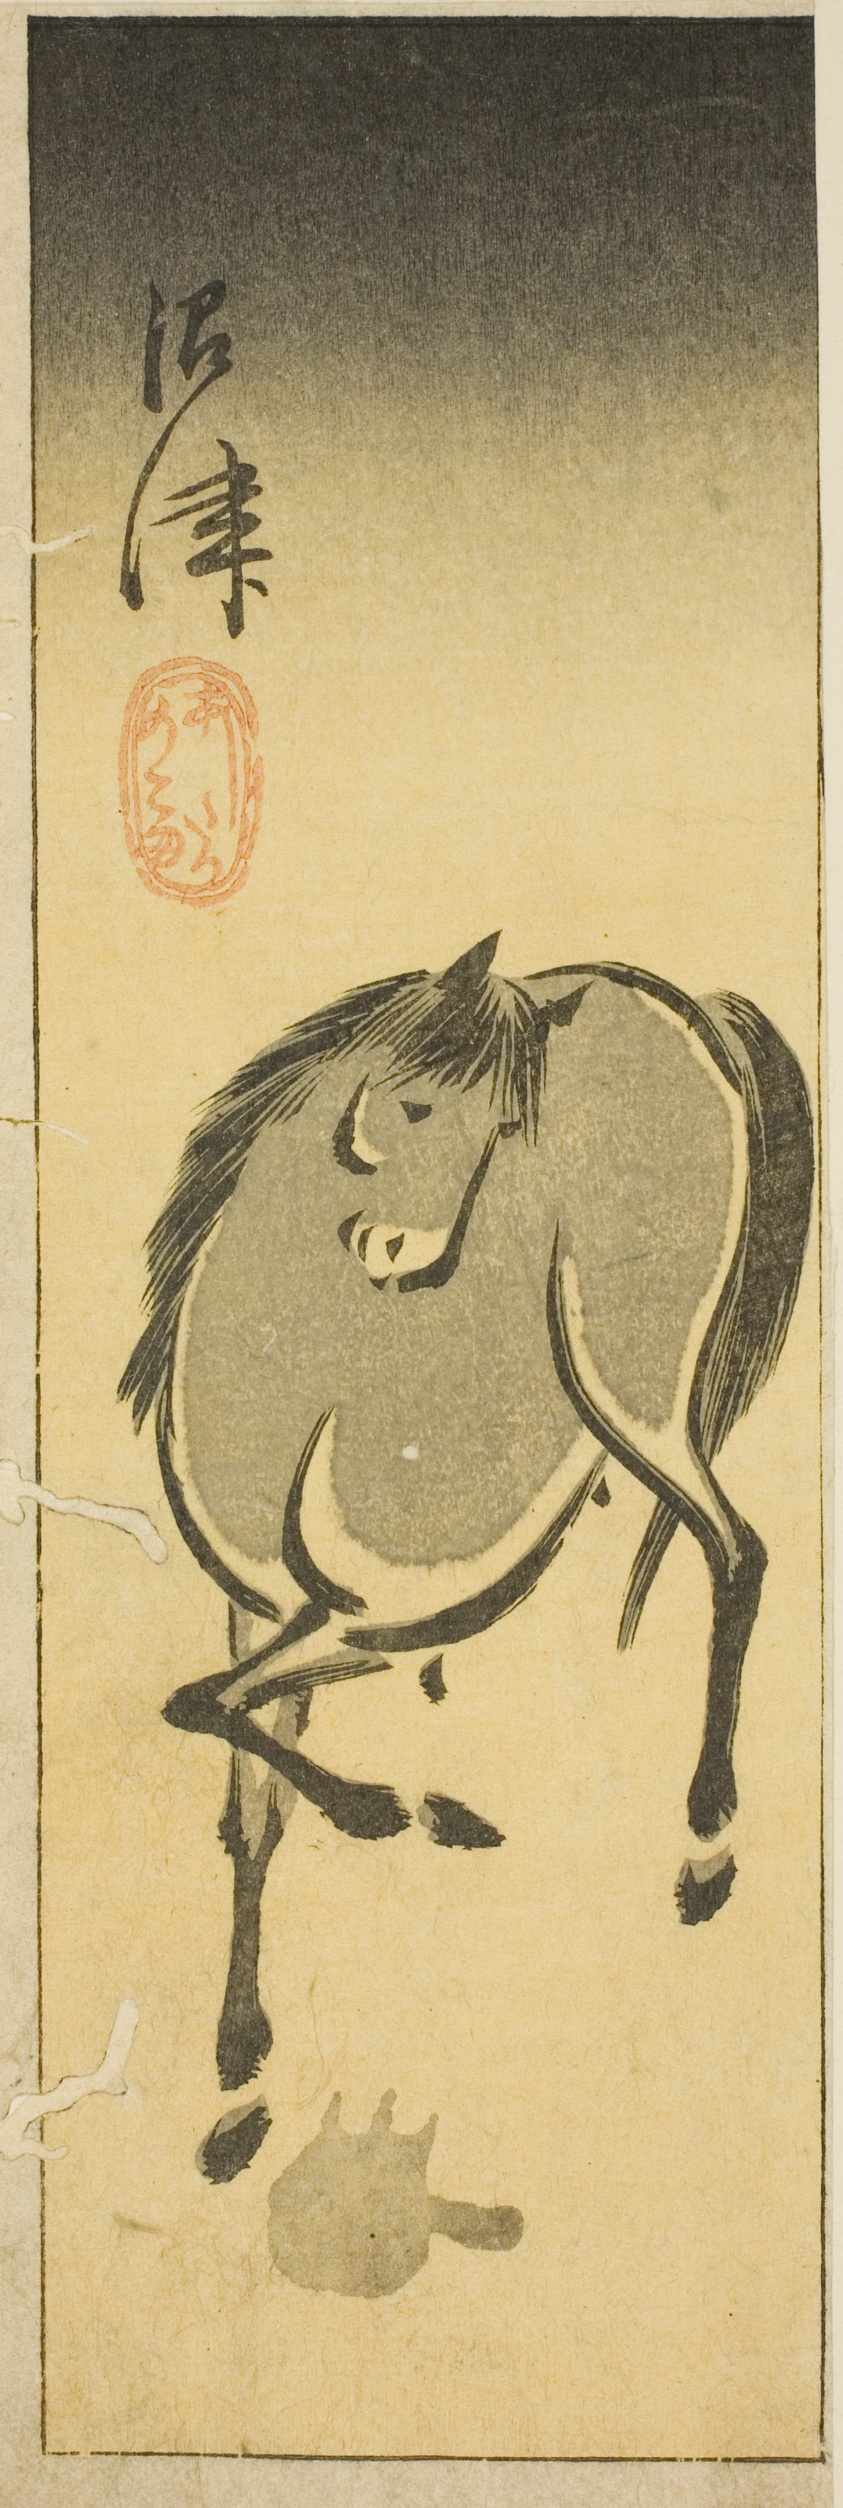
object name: Print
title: Numazu, section of sheet no. 3 from the series "Cutout Pictures of the Tokaido (Tokaido harimaze zue)"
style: Japanese (culture or style)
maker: Utagawa Hiroshige 歌川 広重; Japanese, 1797-1858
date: c. 1848/52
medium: Color woodblock print; section of harimaze sheet (uncut sheet: 1939.1291)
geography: Japan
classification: woodblock print; print; asian art